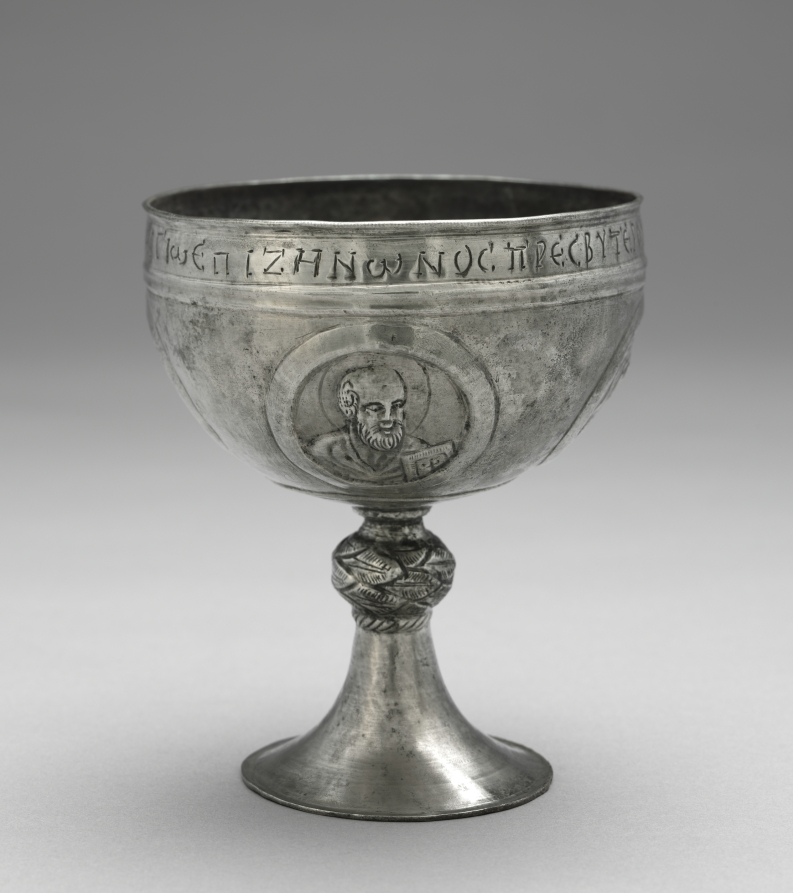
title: Chalice from the Beth Misona Treasure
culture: early Byzantium, Constantinople or Syria, Byzantine period, 6th-7th Century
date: c. 500–700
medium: silver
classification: Metalwork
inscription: the Greek inscription at the top, under an engraved line translates as: + The priest, KYRIAKOS, son of DOMNOS, (gave this chalice) to St. Sergios, in the time of Zeno the priest.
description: These four liturgical silver vessels—a paten and three chalices (1950.378–81)—form what is now called the Beth Misona Treasure, named for the village in northern Syria for which the objects were made. While nothing is known about the exact location and circumstances of the treasure's discovery, the people of the village of Beth Misona were, like other Christian communities in Syria and Palestine, probably forced to bury their church silver to hide it from the Persians or Arabs, who conquered their lands in the first half of the 600s. The paten, which held pieces of Eucharistic bread used during Mass, is decorated with an engraved Latin cross surrounded by a dedicatory inscription that names the paten's donor—Domnos—and its original location, the church of Saint Sergios in Beth Misona. The chalices, which contained the Eucharistic wine used during Mass, feature broad cups decorated with portrait busts of Saints Peter and Paul, Christ, and the Virgin. One chalice bears a dedicatory inscription naming its donor—Kyriakos, Domnos's son—and the priest of the church that received the pious gift—Zeno.